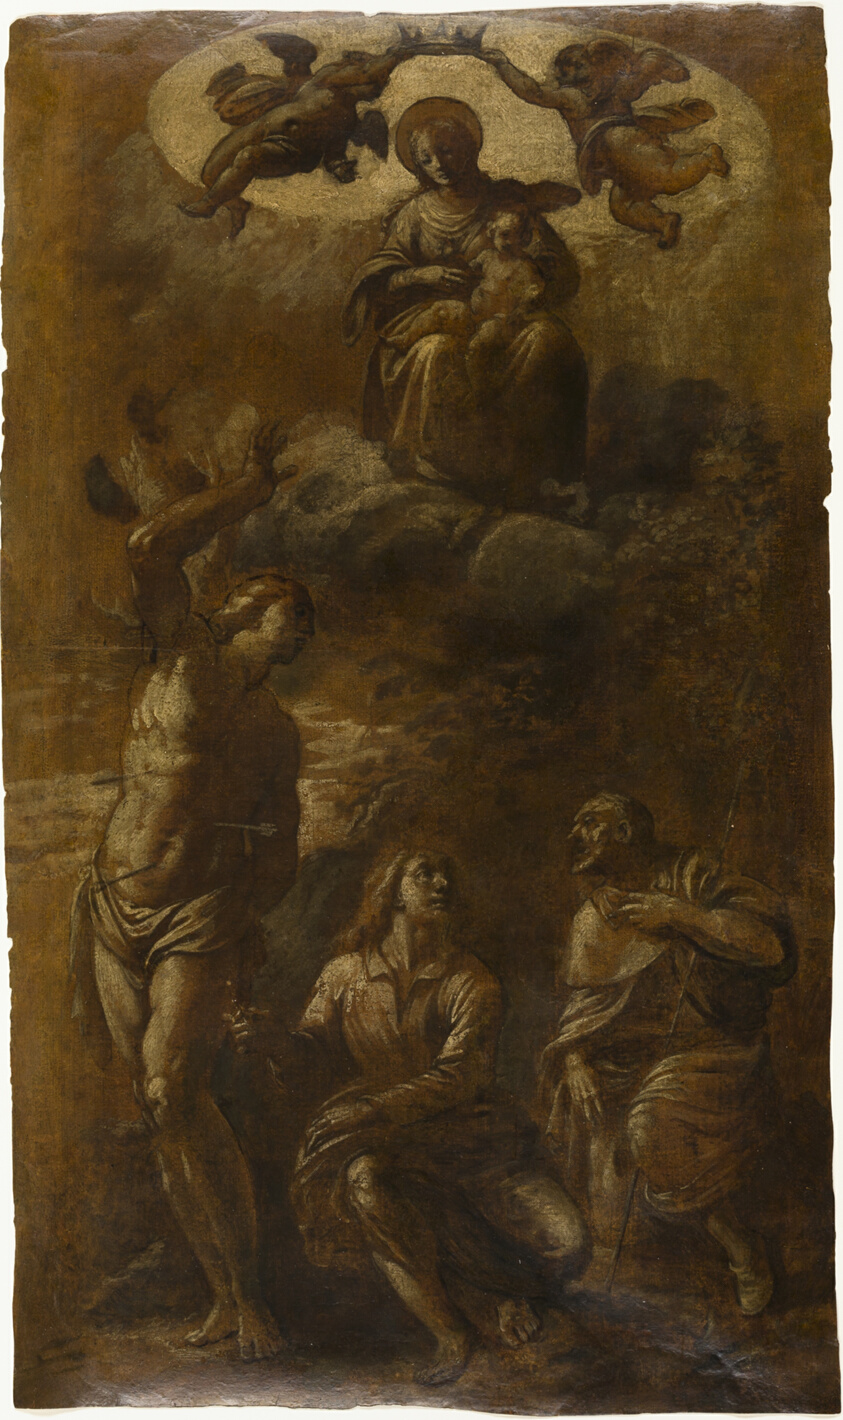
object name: Drawing and Watercolor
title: Virgin and Child in Glory with Saints Sebastian, John the Evangelist, and Roch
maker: Pasquale Ottino (Italian, 1578-1630)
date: c. 1610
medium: Oil with graphite (varnished) on cream laid paper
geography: Italy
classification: oil on paper; drawings (visual works); prints and drawing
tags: Virgin and child/Madonna and child, Christian subjects, mythology, prints and drawings, saints